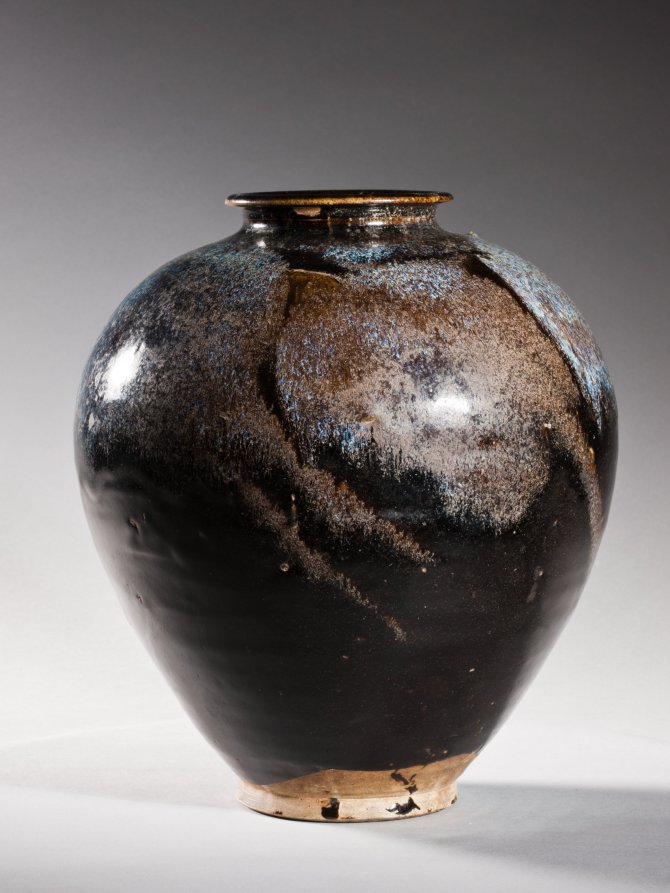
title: Jar: Black Ware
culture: China, Henan province, Huangdao kilns, Tang dynasty (618-907)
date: 700s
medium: glazed stoneware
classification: Ceramic